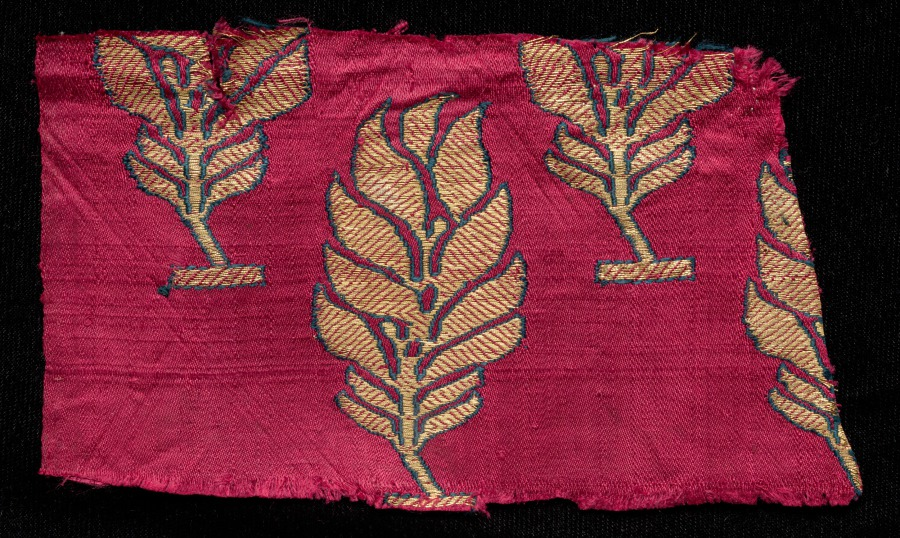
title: Brocade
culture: India, Benares ?, 19th century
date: 1800s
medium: brocade, "kimkhwab"; silk and gold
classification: Textile